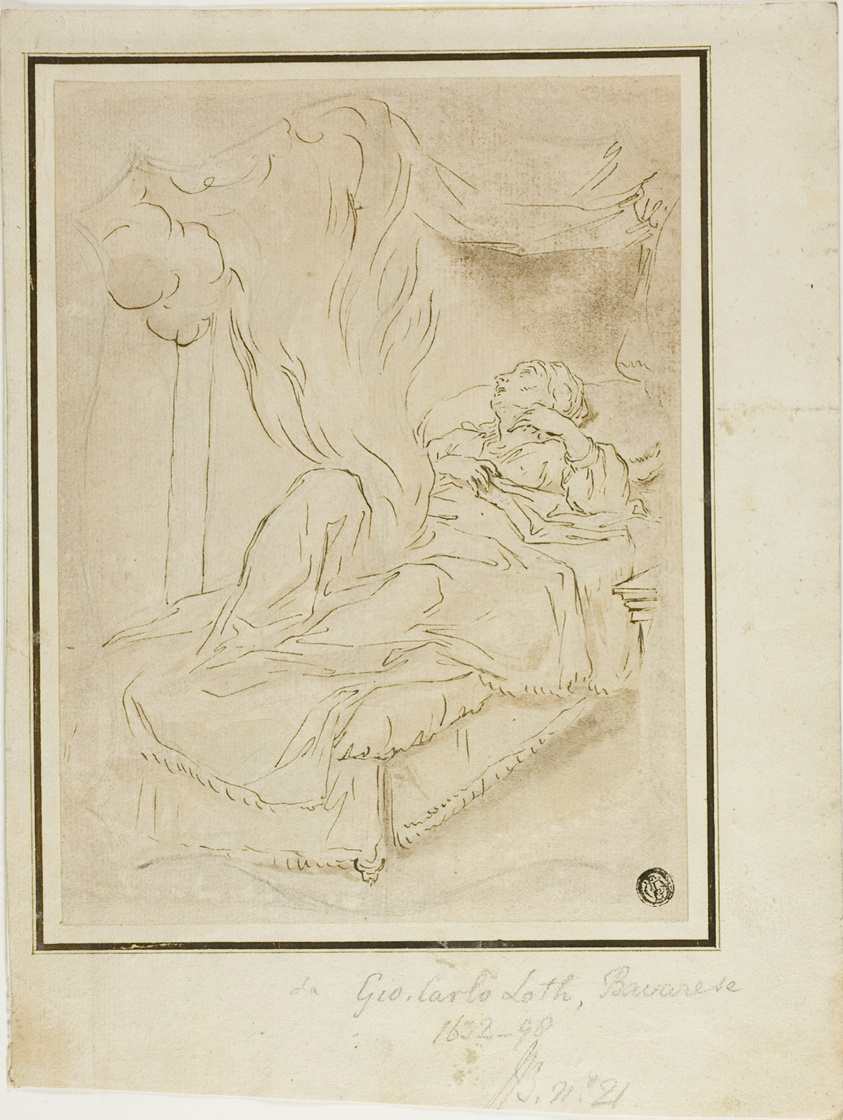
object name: Drawing and Watercolor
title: Danae and the Shower of Gold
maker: Johann Carl Loth (German, 1632-1698)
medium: Pen and brown ink with brush and brown wash over black chalk, on buff laid paper, laid down on ivory laid paper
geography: Germany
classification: pen and ink drawings; drawings (visual works); prints and drawing